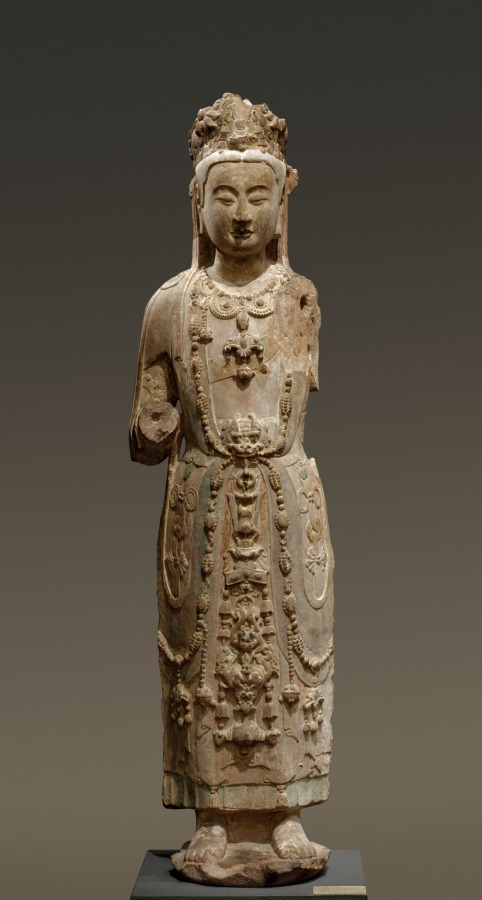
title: Bodhisattva Guanyin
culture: China, late Northern Qi (550–577) or early Sui dynasty (581–618)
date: late 500s–early 600s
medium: sandstone with polychromy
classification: Sculpture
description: The artistic excellence of this bodhisattva is further reinforced by comparable outstanding Chinese Buddhist sculptures excavated at Qingzhou in Shandong Province in 1996—one of the most sensational and significant archaeological finds of the 1900s. Like related types among the Qingzhou finds, this statute has a gently smiling face and meticulous detailing of splendid jewelry. A noticeable difference, however, is the unique yingluo 瓔珞 (mukt hara) worn by the bodhisattva for personal adornment. The somewhat bizarre but imaginative combination of a string of jewels with grotesque animal masks, flying apsara, jade pendants, dragons, and metal ornaments was probably a regional decorative style of Shanxi Province.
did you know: The carved and painted back suggest that the bodhisattva was originally displayed where it could be viewed in the round.